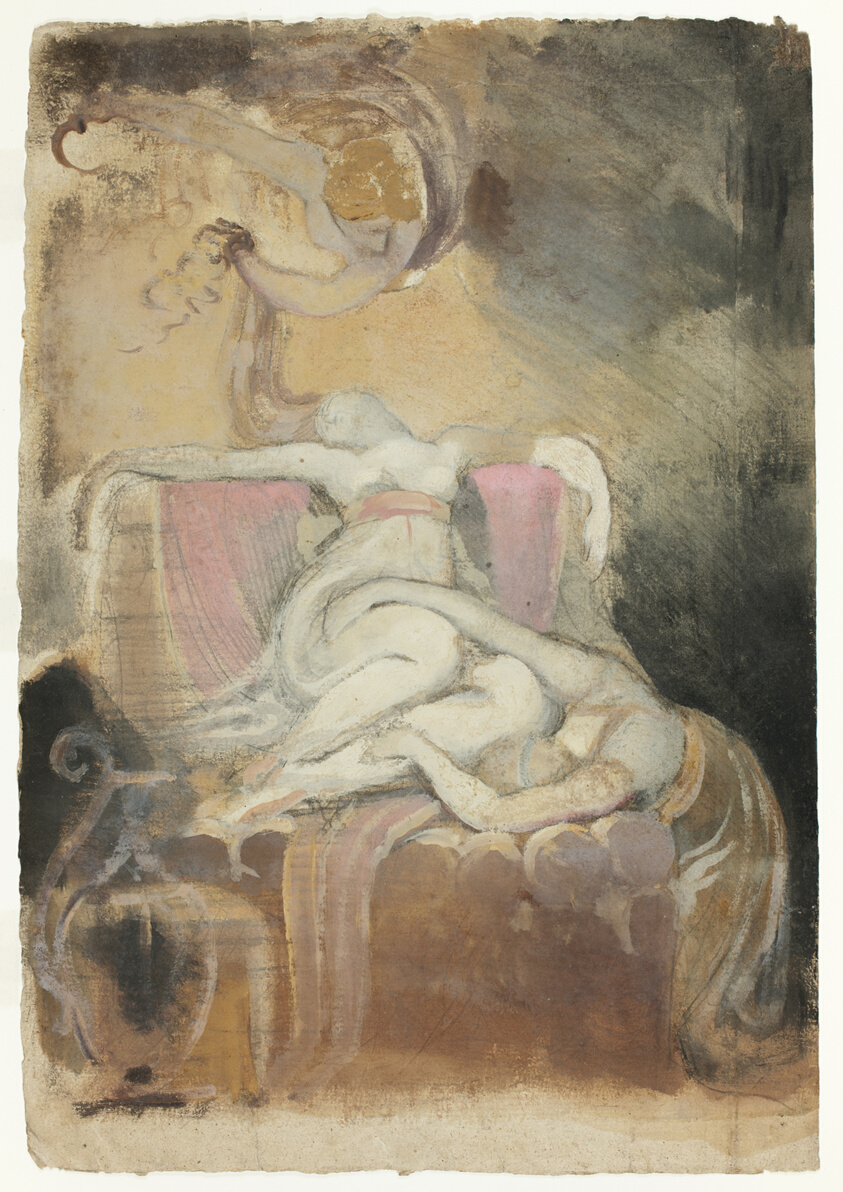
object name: Drawing and Watercolor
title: Sketch for 'Dido on the Funeral Pyre' (recto); Erotic Sketch of Man and Woman (verso)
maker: Henry Fuseli (Swiss, active in England, 1741-1825)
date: c. 1781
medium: Oil paint over charcoal (recto), and black chalk (verso), on ivory laid paper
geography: England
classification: oil on paper; drawings (visual works); prints and drawing; paper